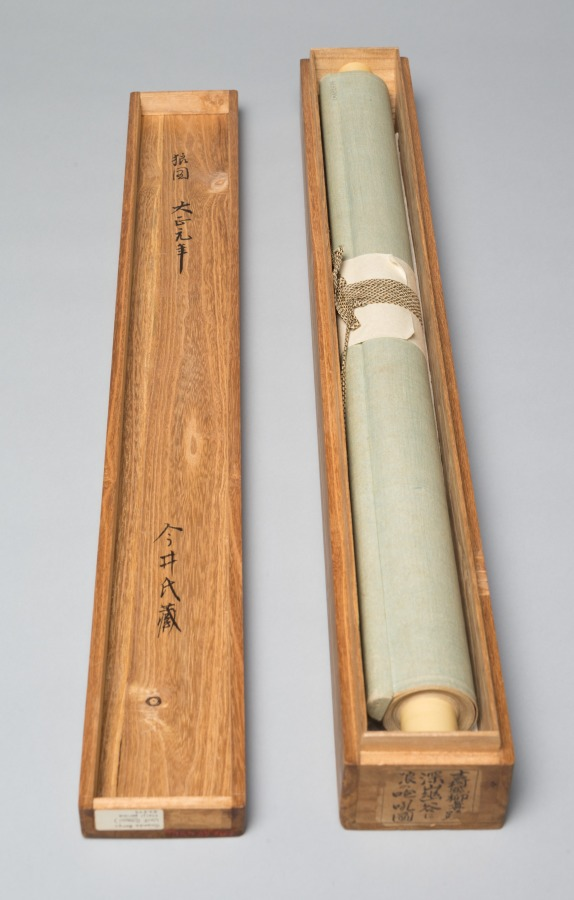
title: Howling Wolf in a Deep Mountain Valley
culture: Japan, Taishō period (1912–26)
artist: Yoshimura Hōryū (Japanese, 1874–1950)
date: 1912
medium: Hanging scroll; ink and color on silk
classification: Painting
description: A wolf howls beneath the tall pines in a misty landscape. The painter was born in the bustling city of Osaka in the Kansai region. He studied with Mori Jihō (1818–1891) and admired the Maruyama school of painters. He was especially gifted at depicting deer, monkeys, tigers, weasels, and other animals.